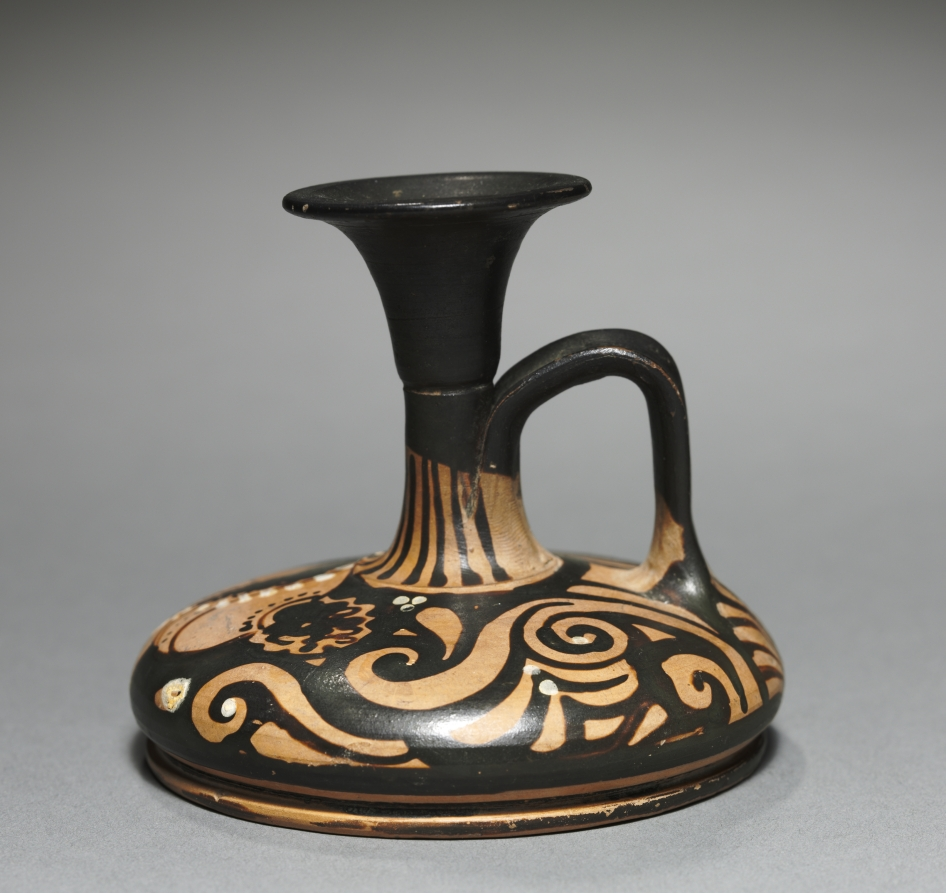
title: Red-Figure Squat Lekythos (Oil Vessel): Female Head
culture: South Italian, Apulian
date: 350–300 BCE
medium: ceramic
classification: Ceramic